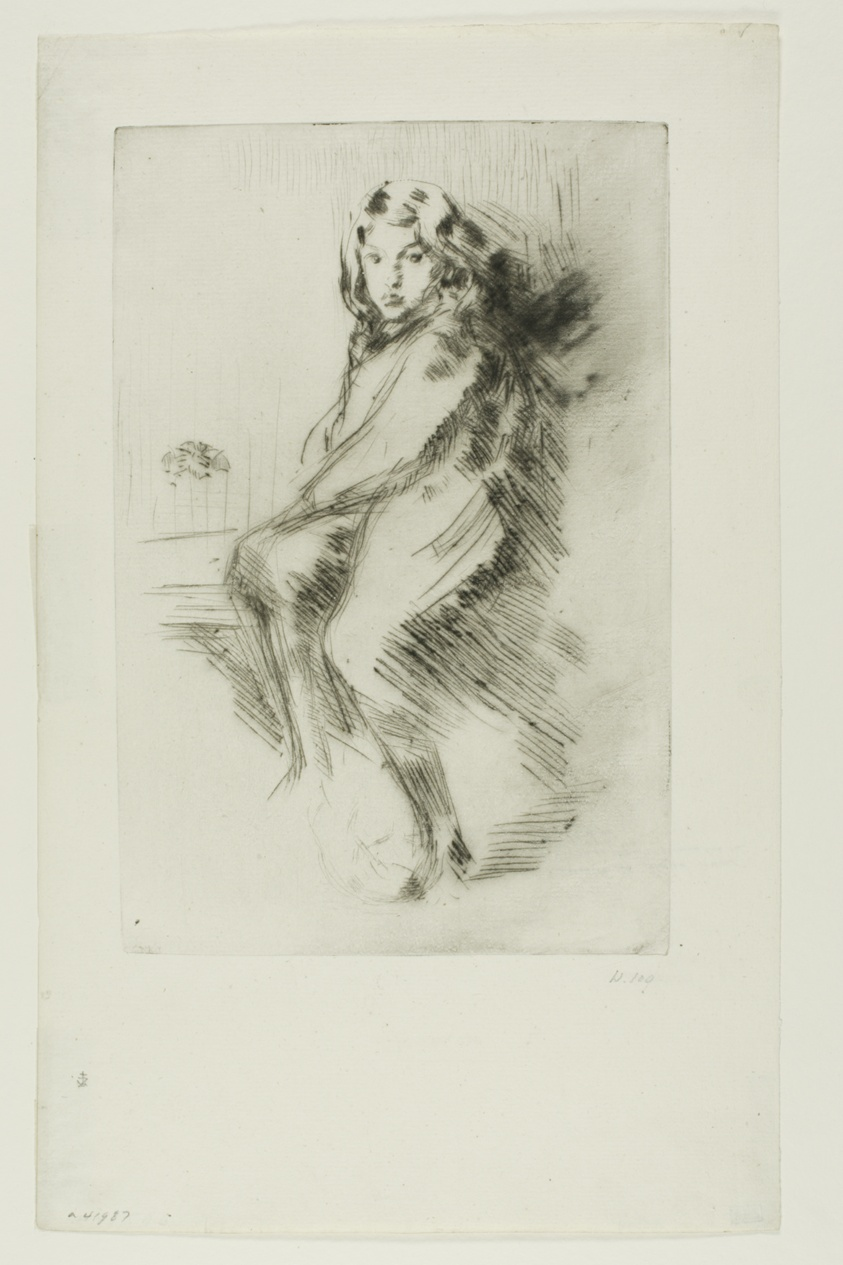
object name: Print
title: The Boy (Charlie Hanson)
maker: James McNeill Whistler (American, 1834-1903)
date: 1875/1876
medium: Drypoint in black ink on ivory laid paper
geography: United States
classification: drypoint; print; prints and drawing; paper